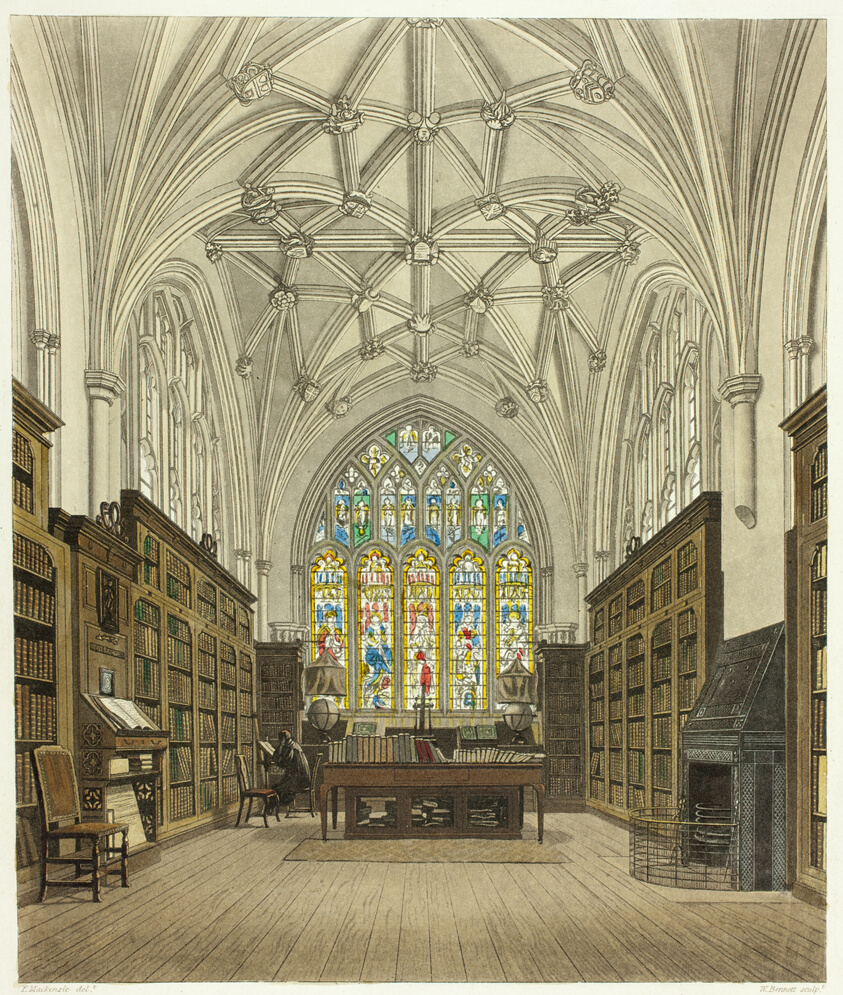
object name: Print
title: Library of Winchester College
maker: William Bennett (English, 1811-1871); after Frederick MacKenzie (English, born Scotland, 1787-1854)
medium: Handcolored aquatint on paper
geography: England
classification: aquatint; print; prints and drawing